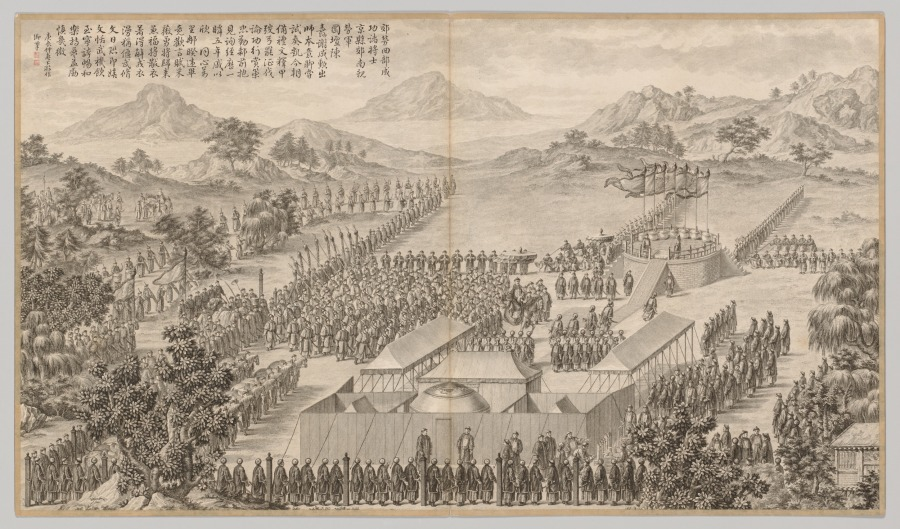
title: Rewards to Generals and Officers in Quelling the Uigurs: from Battle Scenes of the Quelling of Rebellions in the Western Regions, with Imperial Poems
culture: China, Qing dynasty (1644–1911), Qianlong period (1736–95)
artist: Jean Damascene Sallusti (Italian, d. 1781)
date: c. 1765–74; poem dated 1760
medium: etching, mounted in album form, 16 leaves plus two additional leaves of inscriptions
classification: Print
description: This set of etchings was commissioned by Emperor Qianlong to record in pictorial terms the courage of his generals and soldiers in quelling the rebellions in the Western Regions. Qianlong added his own poem to each of the etchings, indicating his appreciation and pride in this demonstration of military might. "Western Regions" refers to the present-day Xingjiang province, often described in Western writing as "Central Asia."